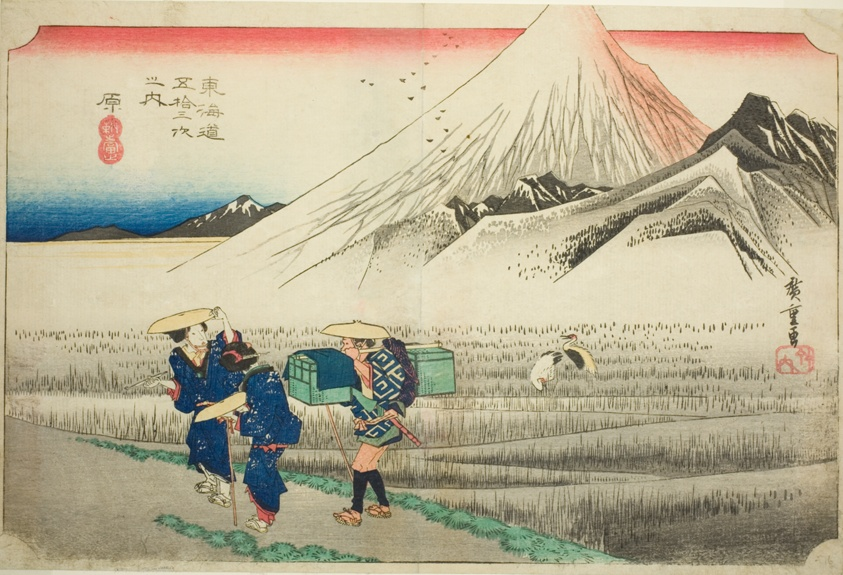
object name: Print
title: Hara: Mount Fuji in the Morning (Hara, asa no Fuji), from the series "Fifty-three Stations of the Tokaido Road (Tokaido gojusan tsugi no uchi)," also known as the Hoeido Tokaido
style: Japanese (culture or style)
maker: Utagawa Hiroshige 歌川 広重; Japanese, 1797-1858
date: c. 1833/34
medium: Color woodblock print; oban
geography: Japan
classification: woodblock print; print; asian art